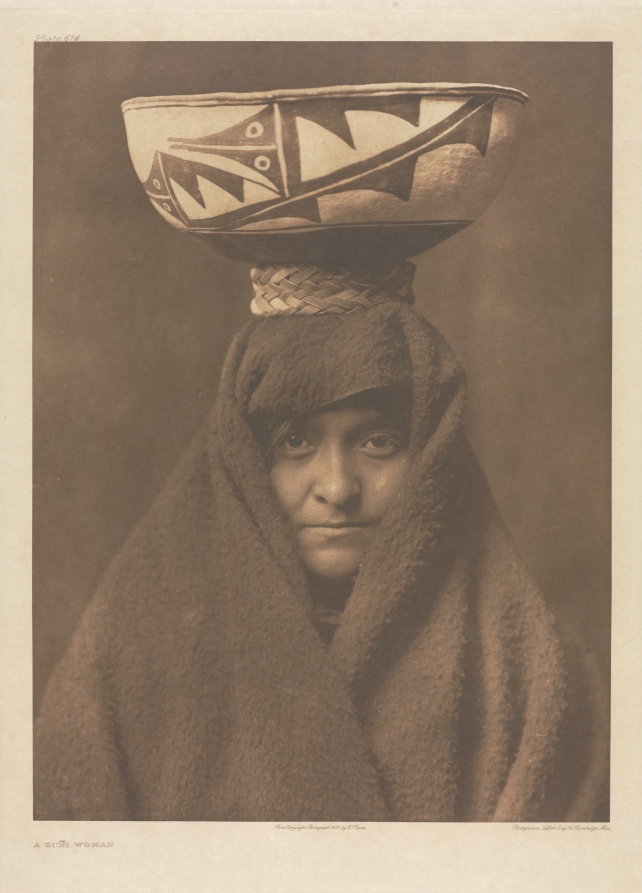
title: Portfolio XVII, Plate 614: A Zuñi Woman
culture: America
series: The North American Indian: being a series of Portfolios picturing and describing the Indians of the United States, the Dominion of Canada, and Alaska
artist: Edward S. Curtis (American, 1868–1952)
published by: The University Press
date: 1903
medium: photogravure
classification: Portfolio